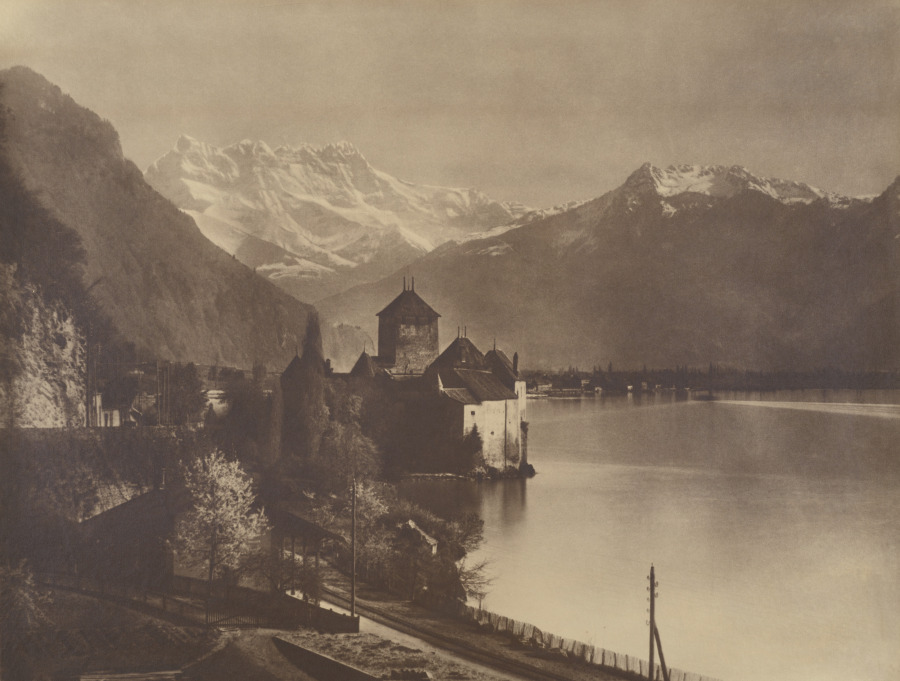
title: Château de Chillon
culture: France, 19th century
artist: Adolphe Braun (French, 1812–1877)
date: c. 1870, printed c. 1900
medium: carbon print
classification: Photograph